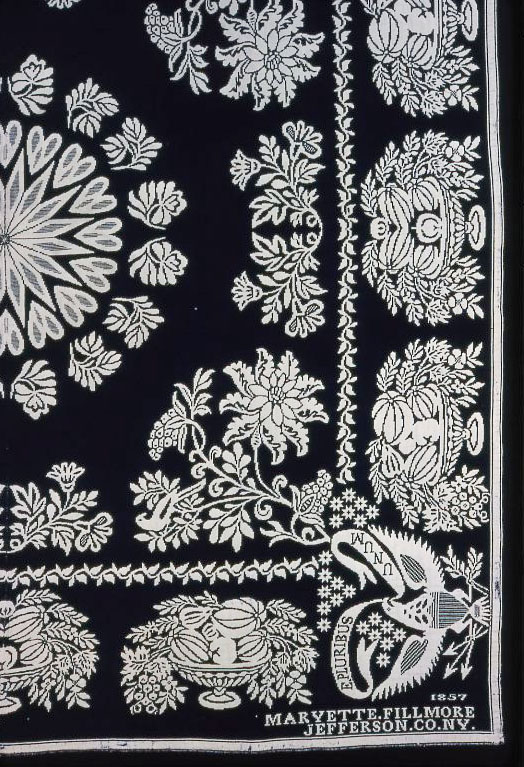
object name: Textile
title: Coverlet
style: 19th century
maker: Harry Tyler (American, 1801-1858); United States, New York, Jefferson County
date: 1857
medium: Cotton and wool, plain weave double cloth; woven on loom with Jacquard attachment; two loom widths joined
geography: New York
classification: weaving - coverlet; coverlet; weaving; textile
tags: eagles, vase, star, flowers, gourd, coverlet